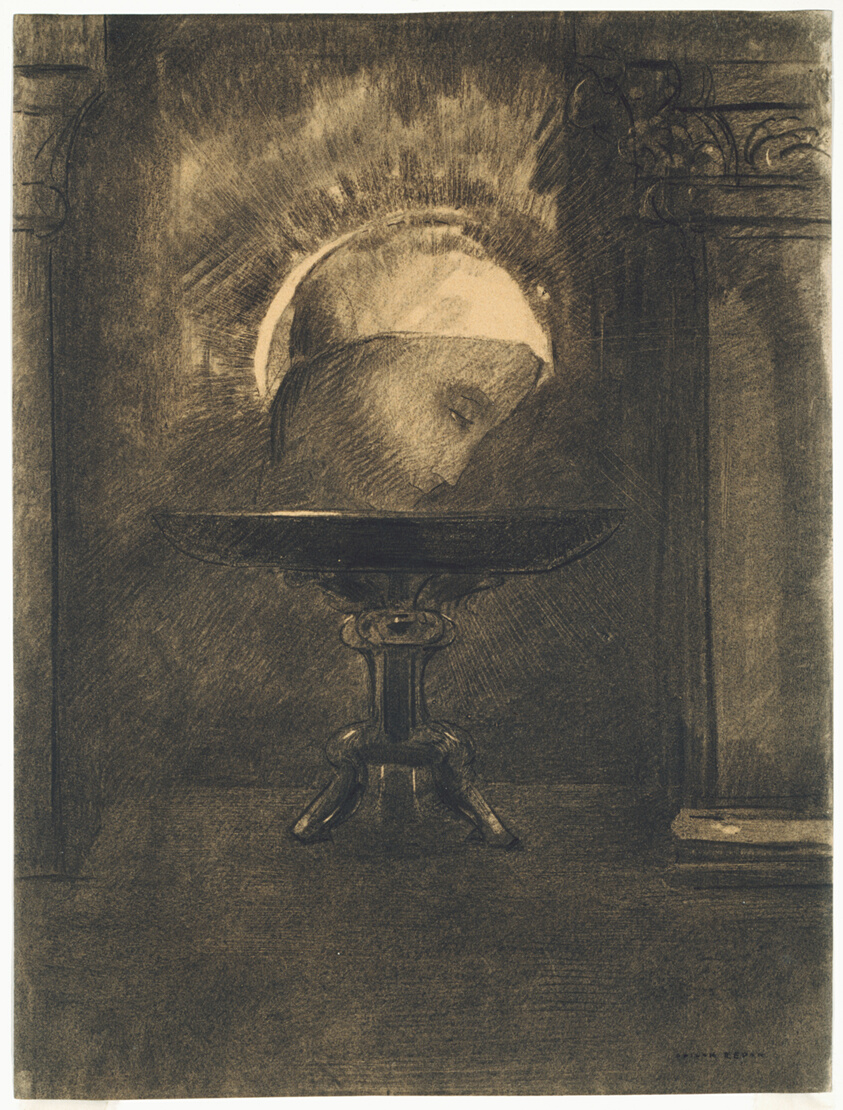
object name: Drawing and Watercolor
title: Head Wearing a Phrygian Cap, on a Salver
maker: Odilon Redon (French, 1840-1916)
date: 1881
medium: Charcoal with black chalk, stumping, scraping and erasing, on pale pink wove paper with red/pink and blue fibers, discolored to buff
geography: France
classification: charcoal; drawings (visual works); prints and drawing; paper